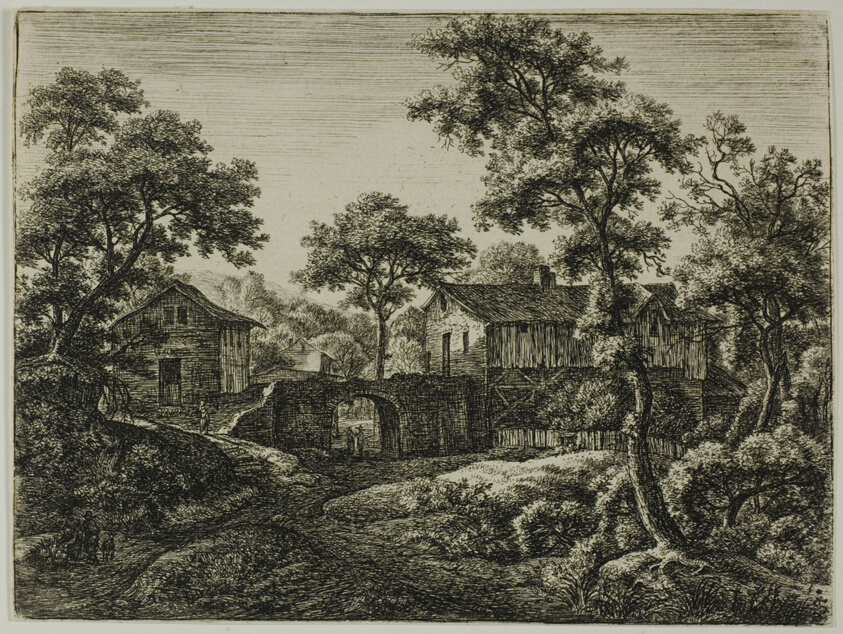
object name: Print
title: The Great Gate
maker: Anthonie Waterloo (Dutch, c. 1610-1690)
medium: Etching on paper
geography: Holland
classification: etching; print; prints and drawing